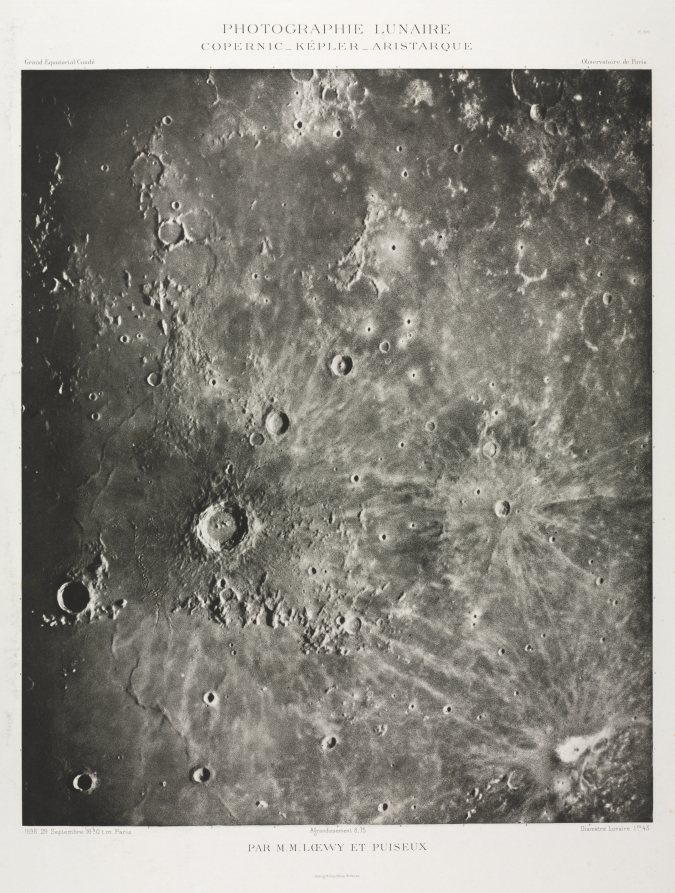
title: Photographie Lunaire: Copernic-Képler-Aristarique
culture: France, 19th century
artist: Maurice Loewy (French, 1833–1907)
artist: Pierre Henri Puiseaux (French, 1855–1928)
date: 1896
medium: photogravure (heliogravure)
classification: Photograph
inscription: Imprinted in black type on recto of photo paper: "Grand Equatorial Coude" Imprinted in black type on recto of photo paper: "1896. 29 Septembre 16 h O.tin.Paris Agrandissement 8.75 Diametre Lunaire 1 m 43" Imprinted in black type along each edge: "1-9" Imprinted in black type on gallery label on verso: "Fraenkel Gallery/49 GEARY STREET SAN FRANCISCO 94108/FURTHERMORE/[30TH Anniversary Exhibition]/Fraenkel Gallery/April 22-June 26, 2010" Imprinted in black type on gallery label on verso: "Fraenkel Gallery/49 GEARY STREET SAN FRANCISCO 94108/LOEWY & PUISEUX/Photographie Lunaire: Copernie-Kepler-/Aristarique, Septembre 29, 1896 heliogravure/22-1/2 x 18-3/4 inches (image)/29-1/2 x 22 inches (sheet)/Plate XVI/[LP.0302.Z]"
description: This plate is from a deluxe 12-volume atlas of the moon created by astronomers Maurice Loewy and Pierre Henri Puiseaux. The atlas remained the most accurate reference of the moon’s surface until the age of space travel. The duo captured thousands of images at the Paris Observatory through a telescope that Loewy invented. It was equipped with a mechanism that tracked the moon’s movements during the exposures. Given weather conditions, they were only able to photograph 50 to 60 nights per year; the project thus took 15 years to complete and contained nearly 100 large-scale photogravures.